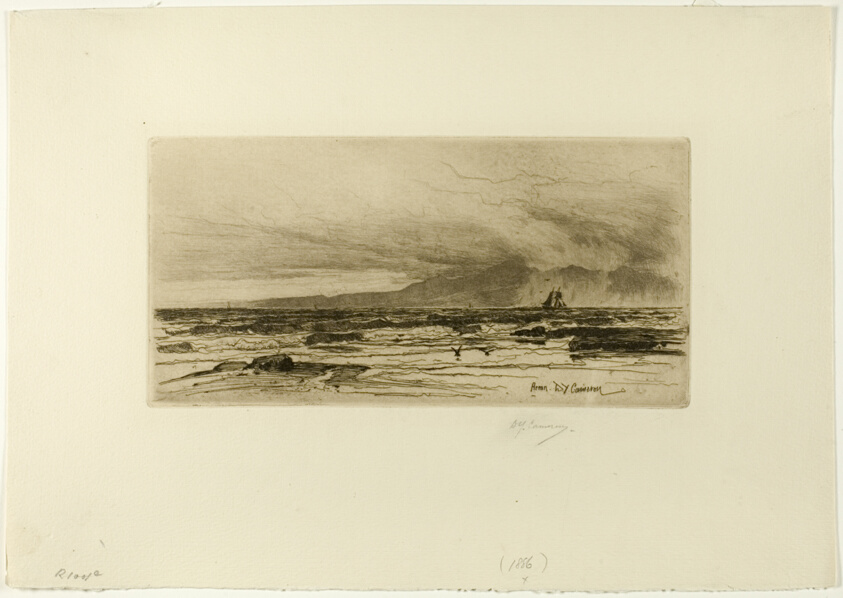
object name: Print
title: Arran, plate fourteen from the Clyde Set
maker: David Young Cameron (Scottish, 1865-1945)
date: 1889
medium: Etching on cream wove paper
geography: Scotland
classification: etching; print; prints and drawing